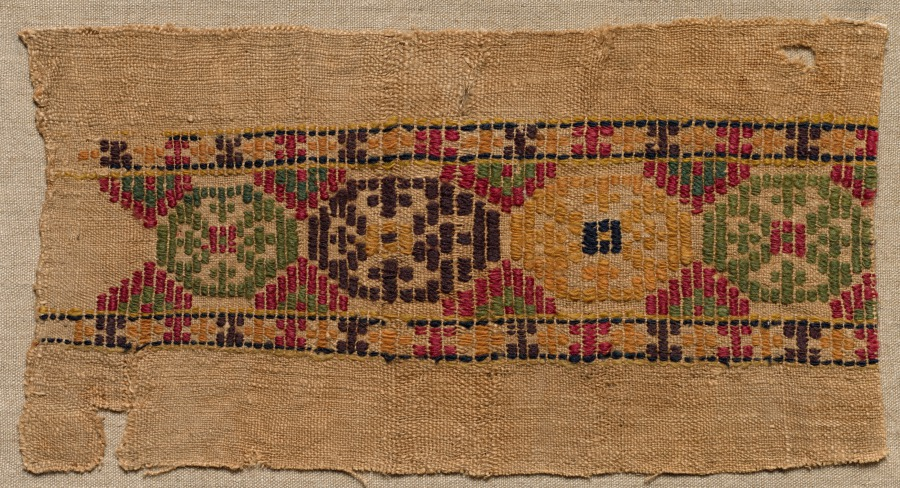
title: Fragment, Probably a Border from a Large Panel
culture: Egypt, Byzantine period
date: 500s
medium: brocaded tabby; linen and wool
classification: Textile